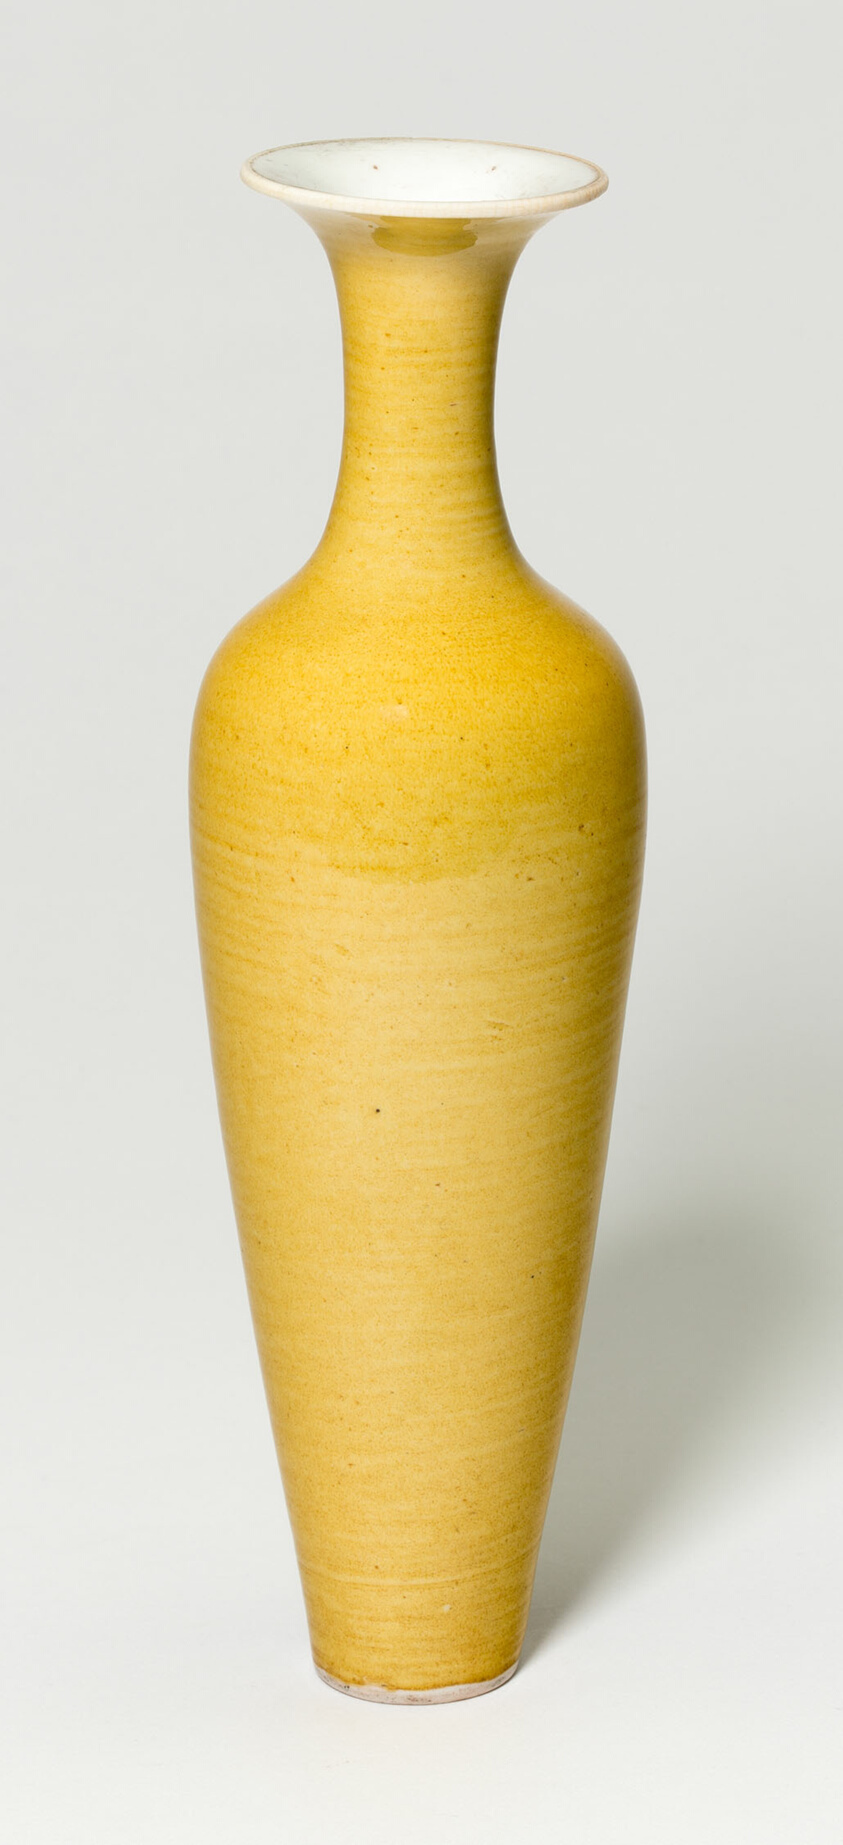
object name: Vessel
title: Amphora-Shaped Vase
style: Chinese (culture or style)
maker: China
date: Qing dynasty (1644–1911), Kangxi reign mark and period (1662–1722)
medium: Porcelain painted in overglaze enamel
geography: China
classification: vase; porcelain; vessel; asian art; ceramics